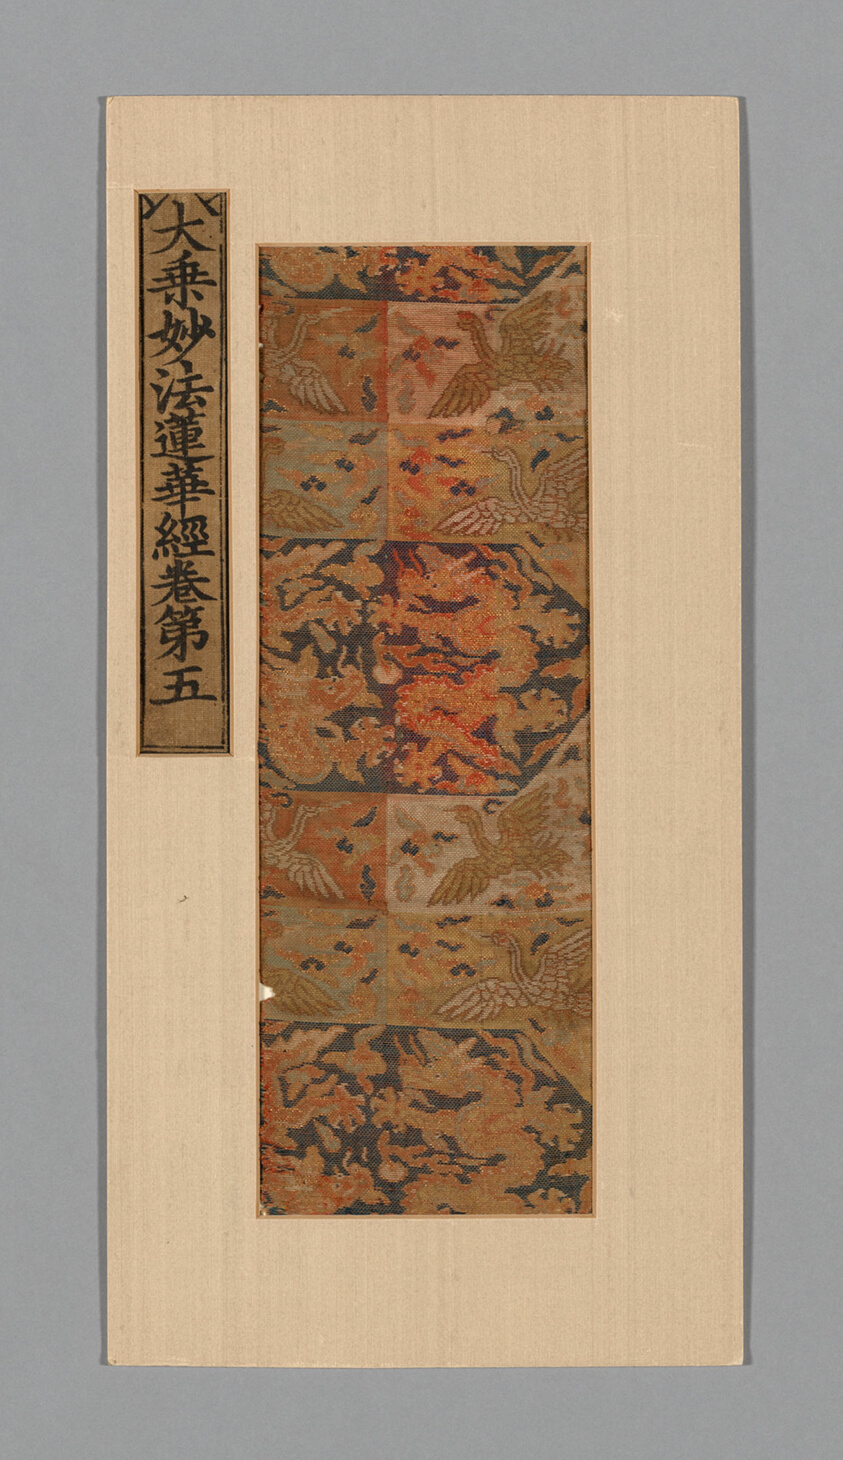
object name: Textile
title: Fragment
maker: China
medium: Silk and gold-leaf-over-lacquered paper strip, plain weave with supplementary patterning wefts bound in plain interlacings; Label: Silk, plain weave; painted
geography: China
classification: textile; weaving